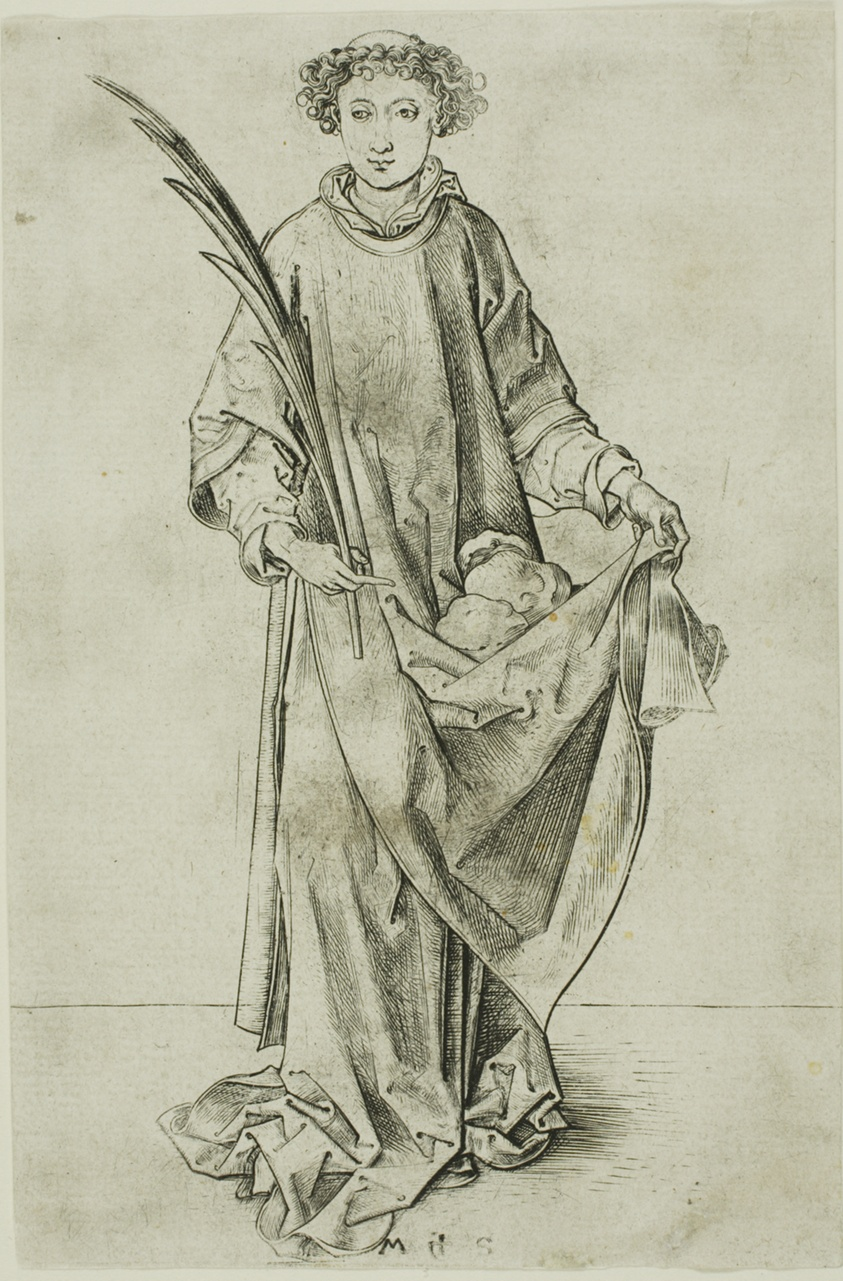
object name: Print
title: St. Stephen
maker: Martin Schongauer (German, c. 1430/50-1491)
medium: Engraving on paper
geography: Germany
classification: engraving; print; prints and drawing